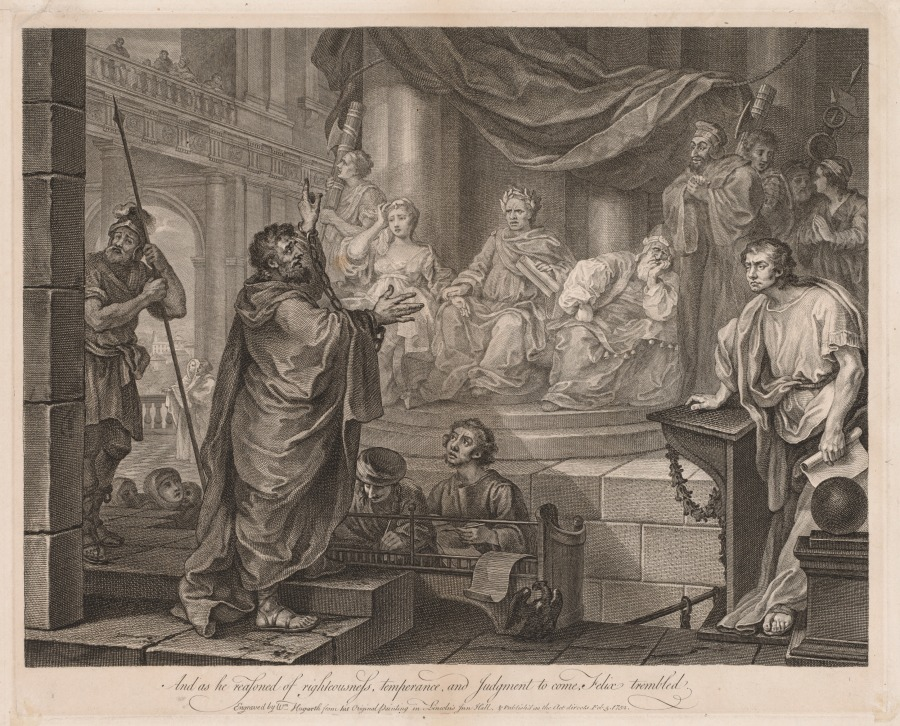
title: Paul before Félix (Large Plate)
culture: England, 18th century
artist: William Hogarth (British, 1697–1764)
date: 1752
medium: engraving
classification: Print